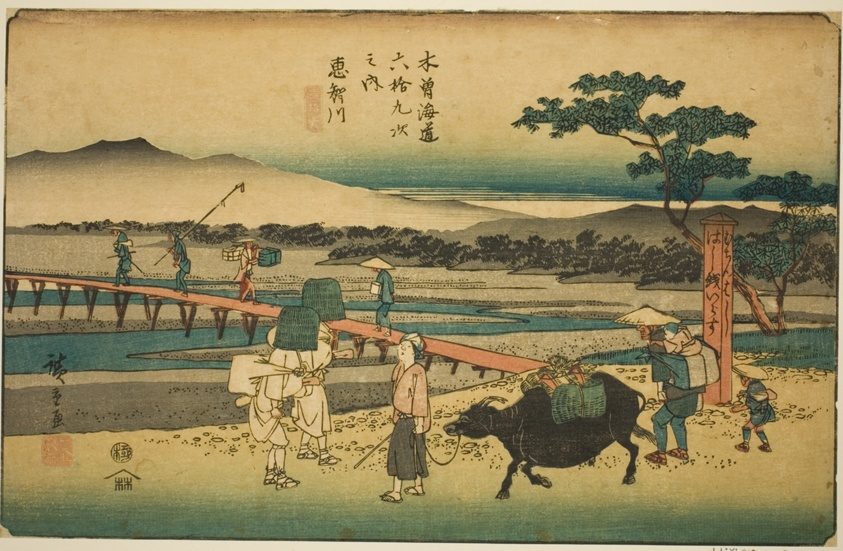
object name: Print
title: No. 66: Echikawa, from the series "Sixty-nine Stations of the Kisokaido (Kisokaido rokujukyu tsugi no uchi)"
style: Japanese (culture or style)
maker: Utagawa Hiroshige 歌川 広重; Japanese, 1797-1858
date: c. 1835/38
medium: Color woodblock print; oban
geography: Japan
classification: woodblock print; print; asian art